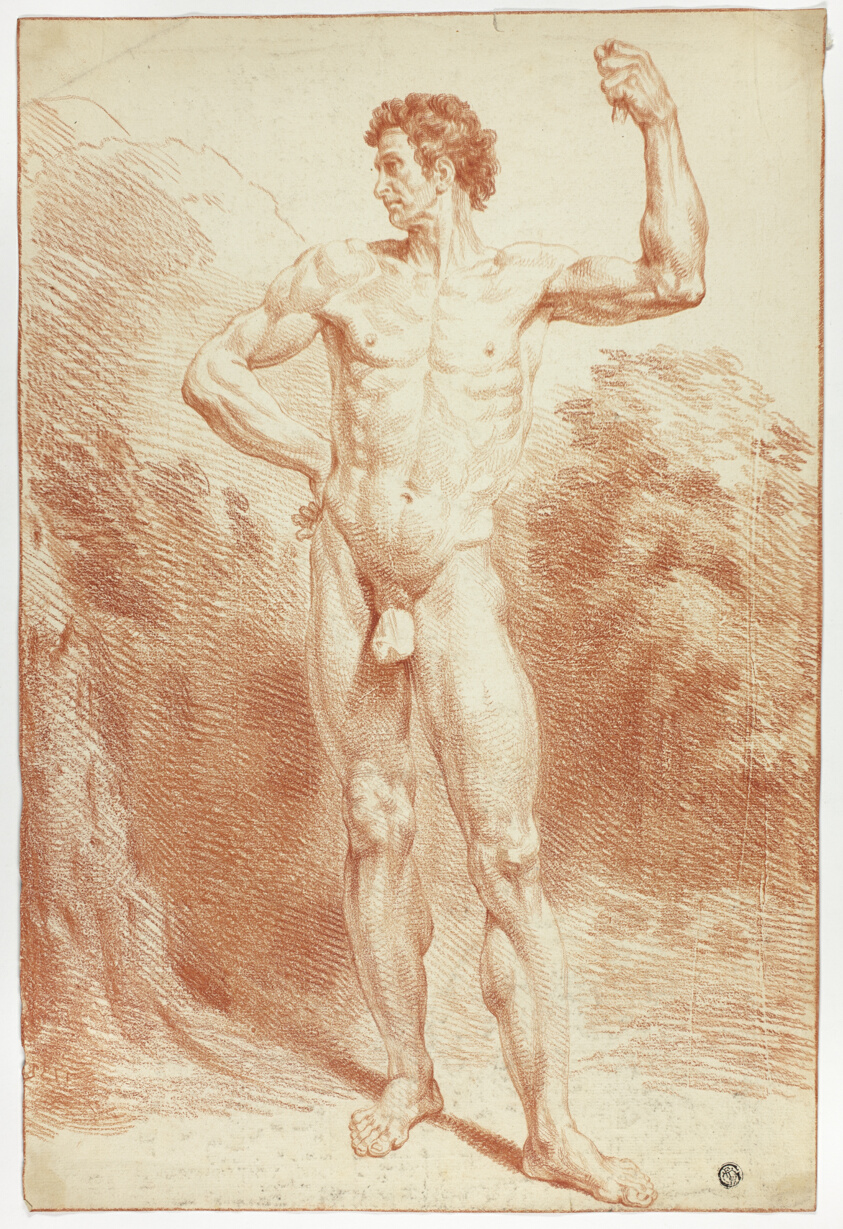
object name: Drawing and Watercolor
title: Standing Academic Male Nude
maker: Unknown Artist; possibly French, 18th century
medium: Red chalk on ivory laid paper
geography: France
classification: chalk; paper; drawings (visual works); prints and drawing